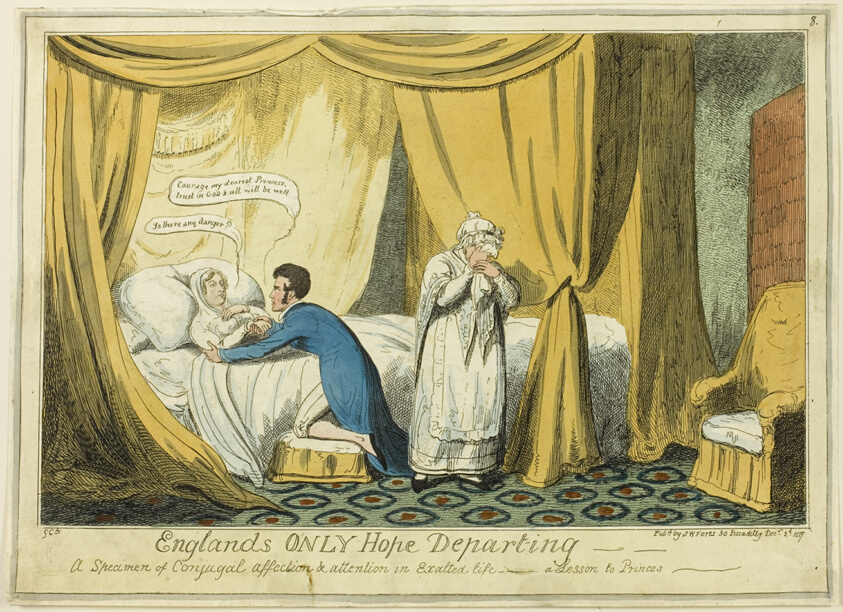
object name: Print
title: England's Only Hope Departing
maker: George Cruikshank (English, 1792-1878); published by S.W. Fores (English, 1761-1838)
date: published December 2, 1817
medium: Hand-colored etching on ivory laid paper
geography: England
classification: etching; print; prints and drawing